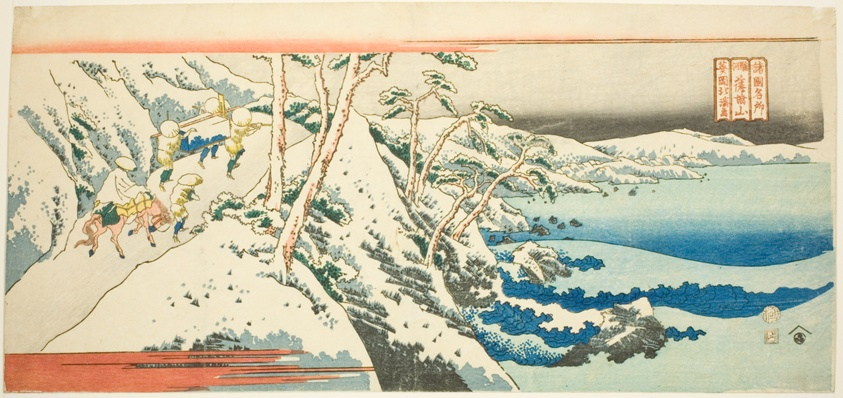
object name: Print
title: Mount Satta in Suruga Province (Suruga Sattayama), from the series "Famous Places in the Provinces (Shokoku meisho)"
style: Japanese (culture or style)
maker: Totoya Hokkei (Japanese, 1780–1850)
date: c. 1830/34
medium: Color woodblock print; horizontal otanzaku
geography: Japan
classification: woodblock print; print; asian art